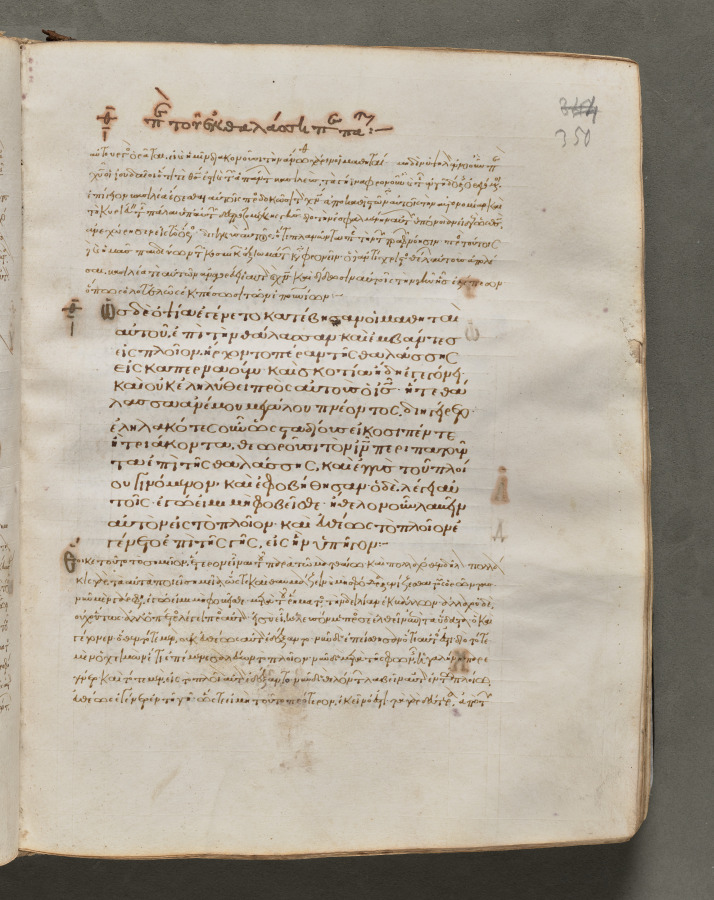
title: Text, folio 350 (recto), from a Gospel Book with Commentaries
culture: Byzantium, Constantinople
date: c. 1000–1100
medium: ink, tempera, and gold on vellum; leather binding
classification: Bound Volume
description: Each of the four gospels in this book opens on a page with brilliantly illuminated borders depicting the author of the text as well as birds—principally peacocks, symbols of the immortality of the soul—and fountains, representing the fountain of life and the salvation of the soul. This volume consists of 428 leaves with texts in Greek. Its level of sophistication suggests that it was probably written and decorated in a monastery in Constantinople.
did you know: Gospel books were carried in procession through Byzantine churches.